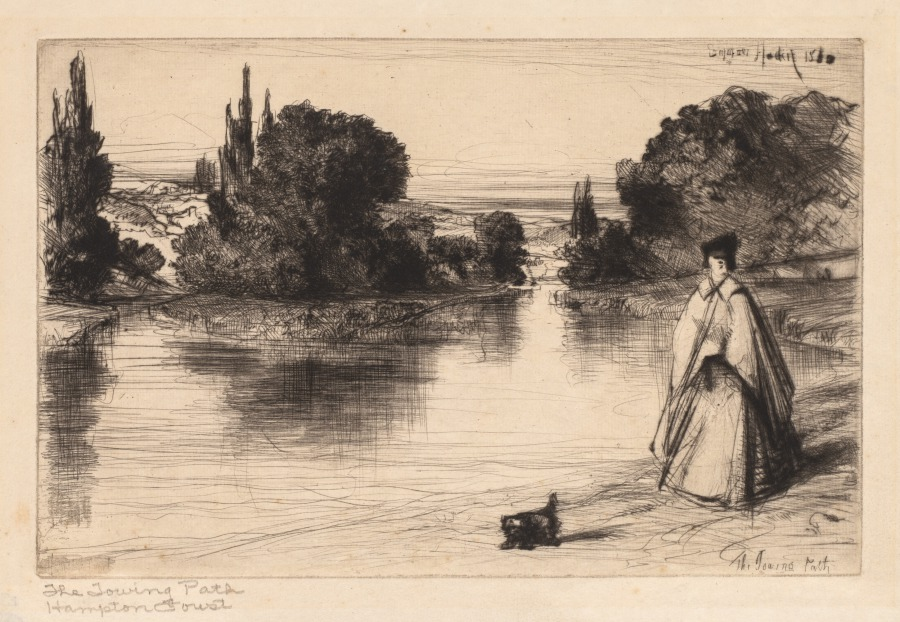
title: The Towing Path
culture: Britain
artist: Francis Seymour Haden (British, 1818–1910)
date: 1864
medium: etching and drypoint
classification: Print